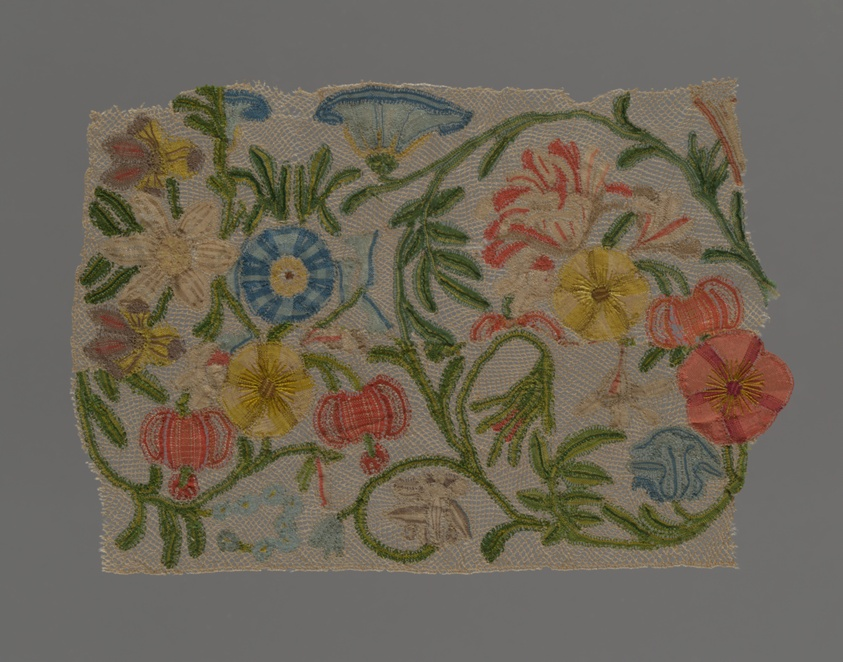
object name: Textile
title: Fragment (Border)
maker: Possibly produced by M. Jesurum & Cie. (Italian, 19th century); Italy, Venice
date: Late 19th century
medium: Silk, bobbin part lace; embroidered in single satin stitches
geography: Venice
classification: textile; lace - bobbin